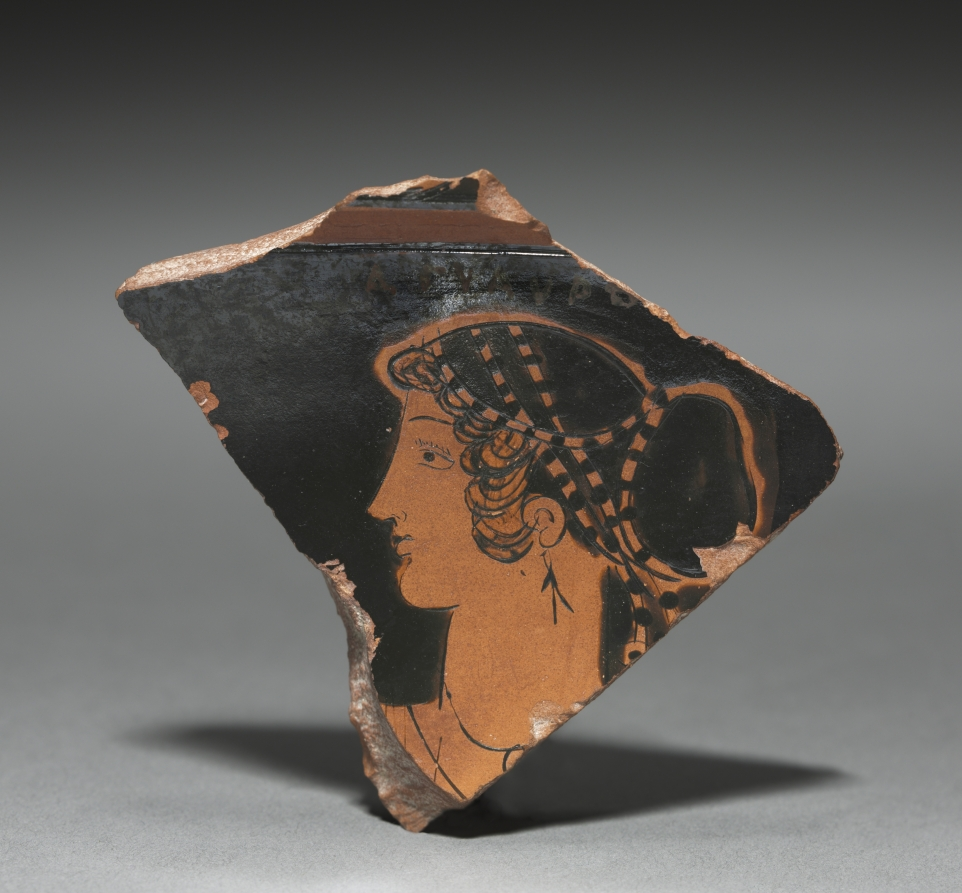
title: Fragment of a Red-Figure Bell-Krater or Calyx-Krater (Mixing Vessel): Female Head (Aglauros)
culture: Greek, Attic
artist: attributed to Nausicaa Painter (also known as Polygnotos III; Greek, Attic, active c. 460–440 BCE)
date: c. 460–450 BCE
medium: ceramic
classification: Ceramic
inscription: inscription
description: Broken from the upper wall of a large mixing vessel, this fragment shows the head of a woman wearing an earring and an elaborate ribbon in her hair. A faint inscription identifies her as Aglauros, a daughter of Kekrops, the mythical first king of Athens. Although worshipped in a shrine near the Acropolis, Aglauros appears quite rarely in Athenian art, usually with her sisters at the birth of Erichthonios, a future king.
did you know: An inscription identifies this woman as Aglauros, an Athenian princess.